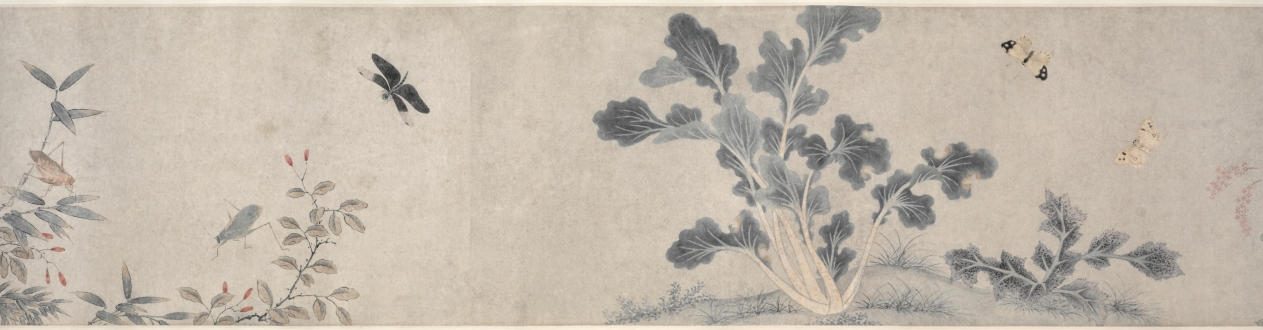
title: Insects and Flowers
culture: China, Qing dynasty (1644-1911) or Republican period (1912-49)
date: c. 1900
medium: Handscroll, ink and color on paper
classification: Painting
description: More than 26 feet long, this scroll presents insects, reptiles, and plants in delicate brushwork and pale colors, referring in style to earlier Southern Song dynasty (1127–1279) bird-and-flower paintings. Upon closer inspection, ants dismember a butterfly and reptiles wait to ambush their prey. An inscription at the end of the painting gives us an idea of its meaning: Attributed to the Qing dynasty scholar Zhang Xigeng (張錫庚, 1801–1861), the inscriber relates the work to an earlier painting by Qian Xuan (錢選, c. 1235–before 1307) and further suggests that the painting may allude to the relentlessness of natural selection. By drawing a parallel to tumultuous episodes in Chinese history, the writer might even hint at the domestic rebellions and the aggression of Western powers against China in his lifetime, particularly the Opium Wars (1839–60).